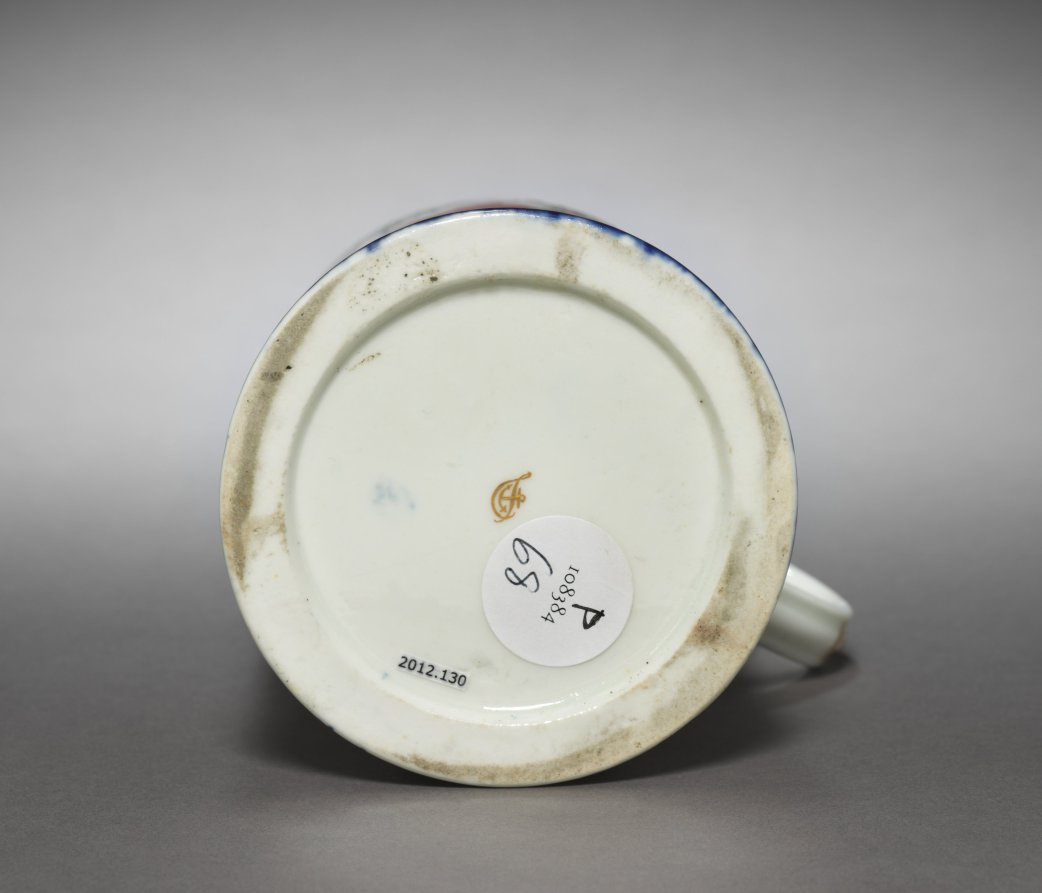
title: Cann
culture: England, 18th century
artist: Chelsea Porcelain Factory (Britain, London, 1745–84)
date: c. 1800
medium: porcelain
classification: Ceramic